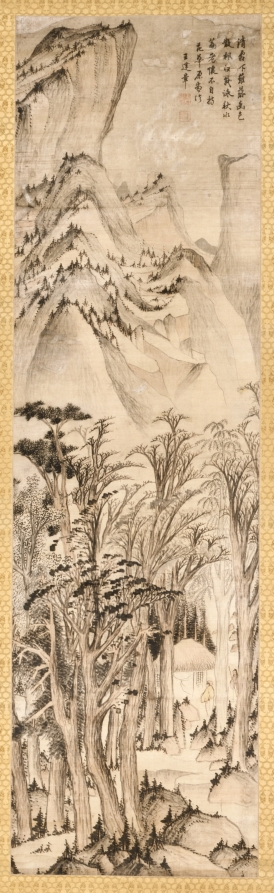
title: Solitary Colors of the Autumn Woods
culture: China, Ming dynasty (1368–1644)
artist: Wang Jianzhang (Chinese, active 1621–1662)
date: first half 1600s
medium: hanging scroll; ink and color on satin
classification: Painting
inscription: Artist's inscription, signature, and 2 seals: Cold frost falls on the fences,/ Solitary colors scatter the maples./ Reciting the chapter of "The Autumn Water,"/ I cannot still the emotion in my old heart. After the style of Fan Hua-yüan [Fan Kuan], Wang Chien-chang . [seals] Wang shih chih yin; Chien-chang. trans. LYSL/HK/WKH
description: Two gentlemen stand outside a thatched hut in a dense forest; some trees have bare branches indicating that the season is early autumn. Wang Jianzhang’s inscribed poem refers to a chapter called “Autumn Water” from Zhuangzi, a famous Daoist text written in the 3rd century BC: "Cold frost falls on the fences, / Solitary colors scatter the maples. / Reciting the chapter of “The Autumn Water,” / I cannot still the emotion in my old heart." Wang Jianzhang lived through the collapse of the Ming dynasty (1368–1644) and the rise of the Qing dynasty (1644–1911), when China was governed by the Manchus, an ethnic people from Manchuria who were traditionally viewed as “barbarians” by the Chinese. The poetic reference to Zhuangzi’s “Autumn Water” seems to discreetly convey Wang’s feelings about his country being taken over. “Autumn Water” was about learning to take steps in the foreign way, but not acquiring a foreign tongue. Perhaps Wang was lamenting his conflicted situation. For survival he had to adapt to the new political and social climate, while still trying to maintain his own identity and Chinese traditions.